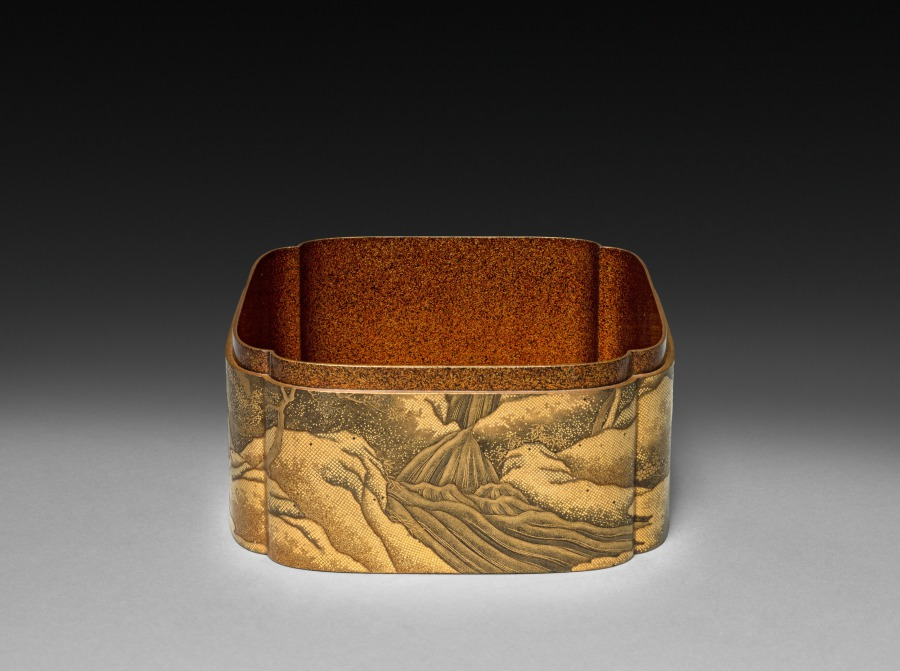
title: Box (bottom)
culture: Japan, Meiji period (1868–1912)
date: late 1800s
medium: wood with lacquer and gold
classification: Lacquer